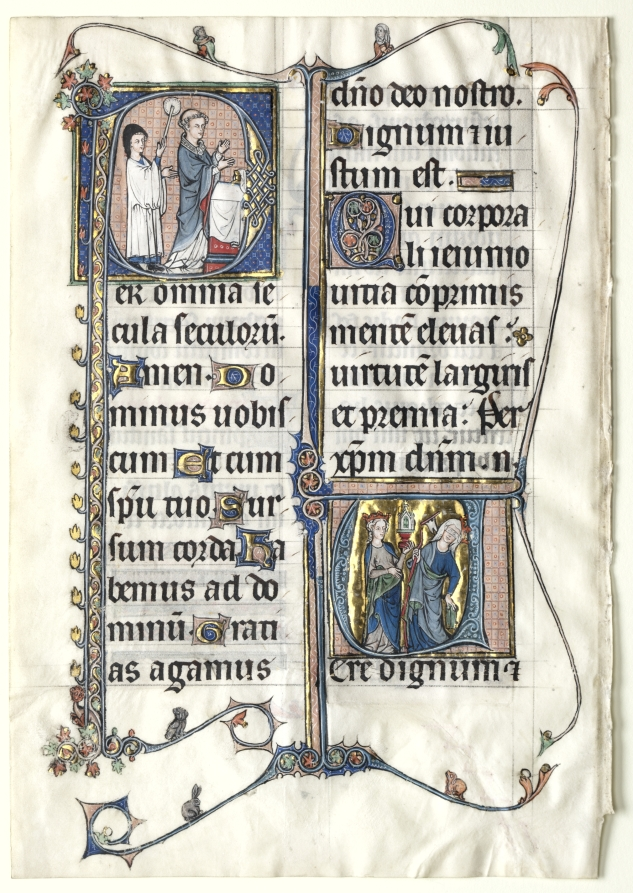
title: Leaf from a Missal with Two Historiated Initials: Initial P[er omnia saecula saeculorum] (A Priest Celebrates Mass) and Initial V[ere dignum et iustum est] (Ecclesia and Synagogue)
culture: France, Beauvais, late 13th-early 14th Century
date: c. 1300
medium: ink, tempera, and gold on vellum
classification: Manuscript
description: This leaf and others are known to survive from a magnificent missal made for the use of Beauvais Cathedral. The two large decorated initials illustrate the preface to the Canon of the Mass.